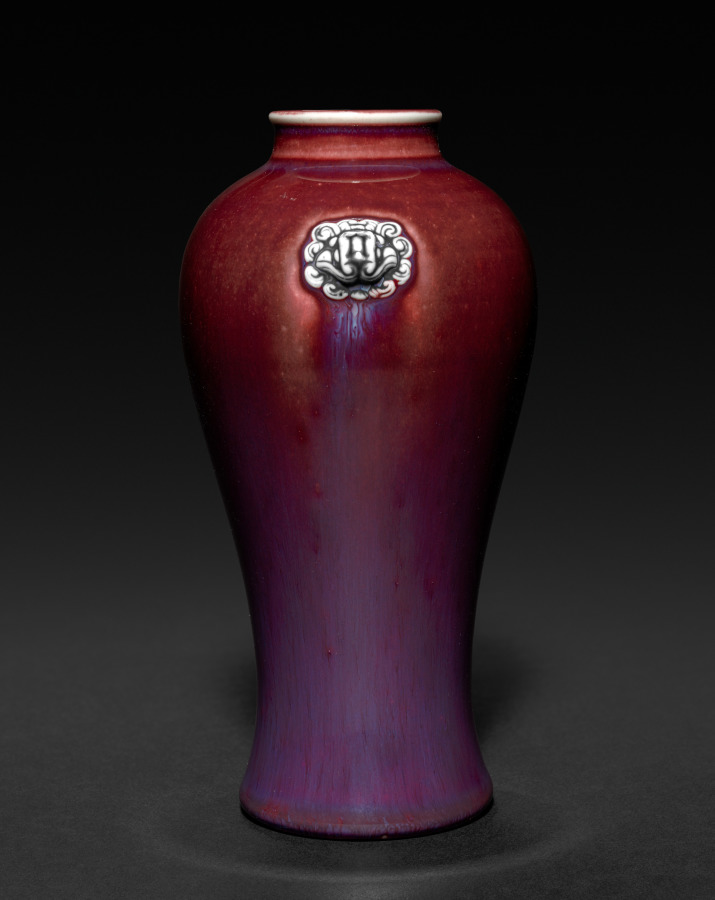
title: Single Stem Vase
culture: Japan, Taishō period (1912–26)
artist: Seifū Yohei IV (Japanese, 1872–1951)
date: 1914–46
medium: Porcelain with molded design and copper-red glaze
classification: Ceramic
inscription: 清風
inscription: 清風造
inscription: 成山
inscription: 清風盧人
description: This vase is copper red in color at the top and becomes purple closer to the bottom, not unlike a Chinese transformation or flambé glaze with mottling and dripping of the glaze. The lip of the vase and much of the lion-head designs remain white. On the box lid, the color of the glaze is called shinsha, which is often glossed as copper red or oxblood, or sometimes cinnabar. Here, it is meant to refer to a Qing-dynasty glazing technique developed in an effort to reproduce a red glaze used during the reign of the Xuande emperor (1426–35) of the Ming dynasty.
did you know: This vase has lion heads for “ears."